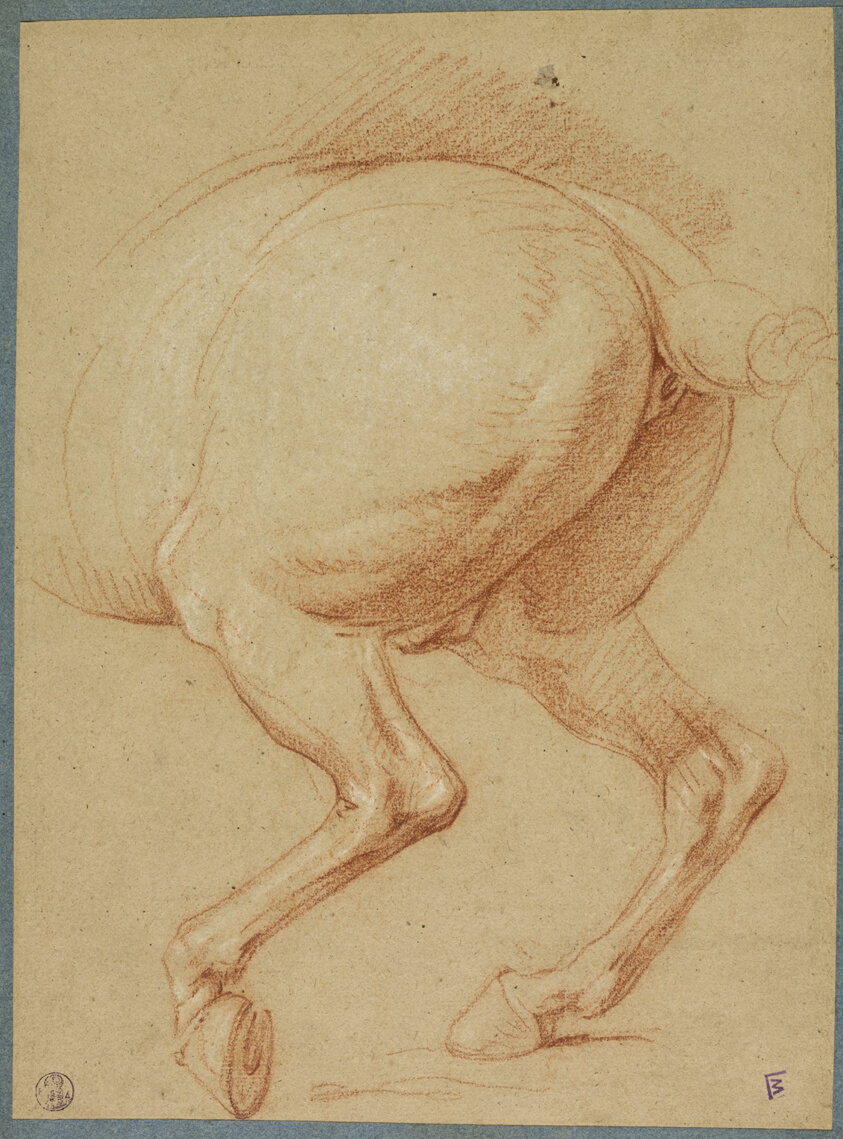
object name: Drawing and Watercolor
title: The Hind Legs of a Horse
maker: Charles Le Brun (French, 1619-1690)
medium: Red and white chalk on brown laid paper, laid down on cream laid paper, with a blue laid paper border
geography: France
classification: drawings (visual works); prints and drawing